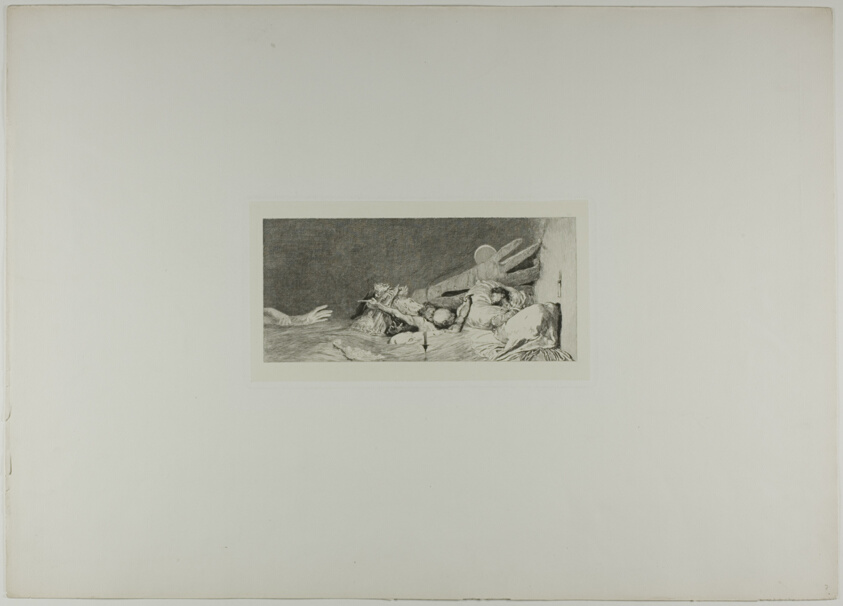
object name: Print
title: Fears, plate seven from A Glove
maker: Max Klinger (German, 1857-1920)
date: 1881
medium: Etching on ivory chine collé on off-white wove paper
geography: Germany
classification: etching; print; prints and drawing